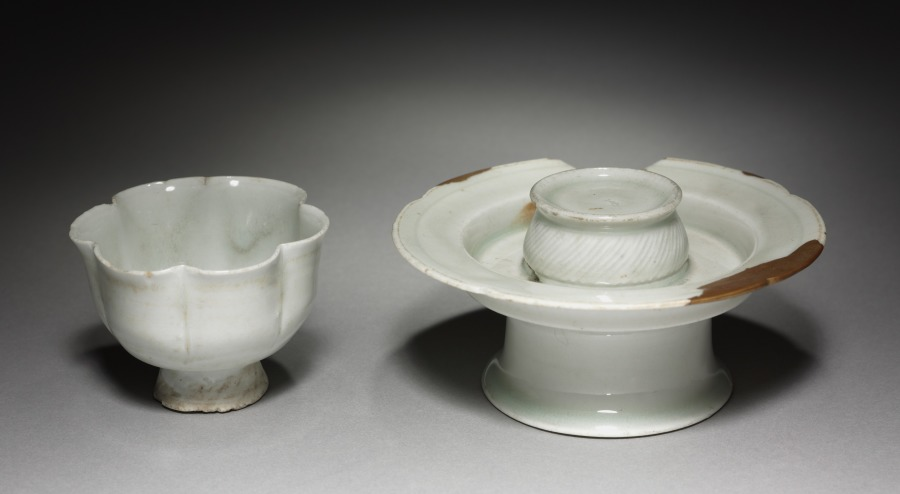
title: Cup and Stand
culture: Korea, Goryeo dynasty (918–1392)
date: 900s-1100s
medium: pottery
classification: Ceramic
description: As early as the seventh century, the practice of drinking tea and wine became an important part of elite culture in Korea. Elites of the Goryeo period commissioned a variety of types of utensils and vessels including this delicate-looking cup and cup stand, not only to make their drinking experience more exciting, but also to show their refined taste.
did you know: Many types of sophisticated stoneware examples such as this cup and cup stand were buried in the tombs of ruling class of the Goryeo dynasty (918–1392).